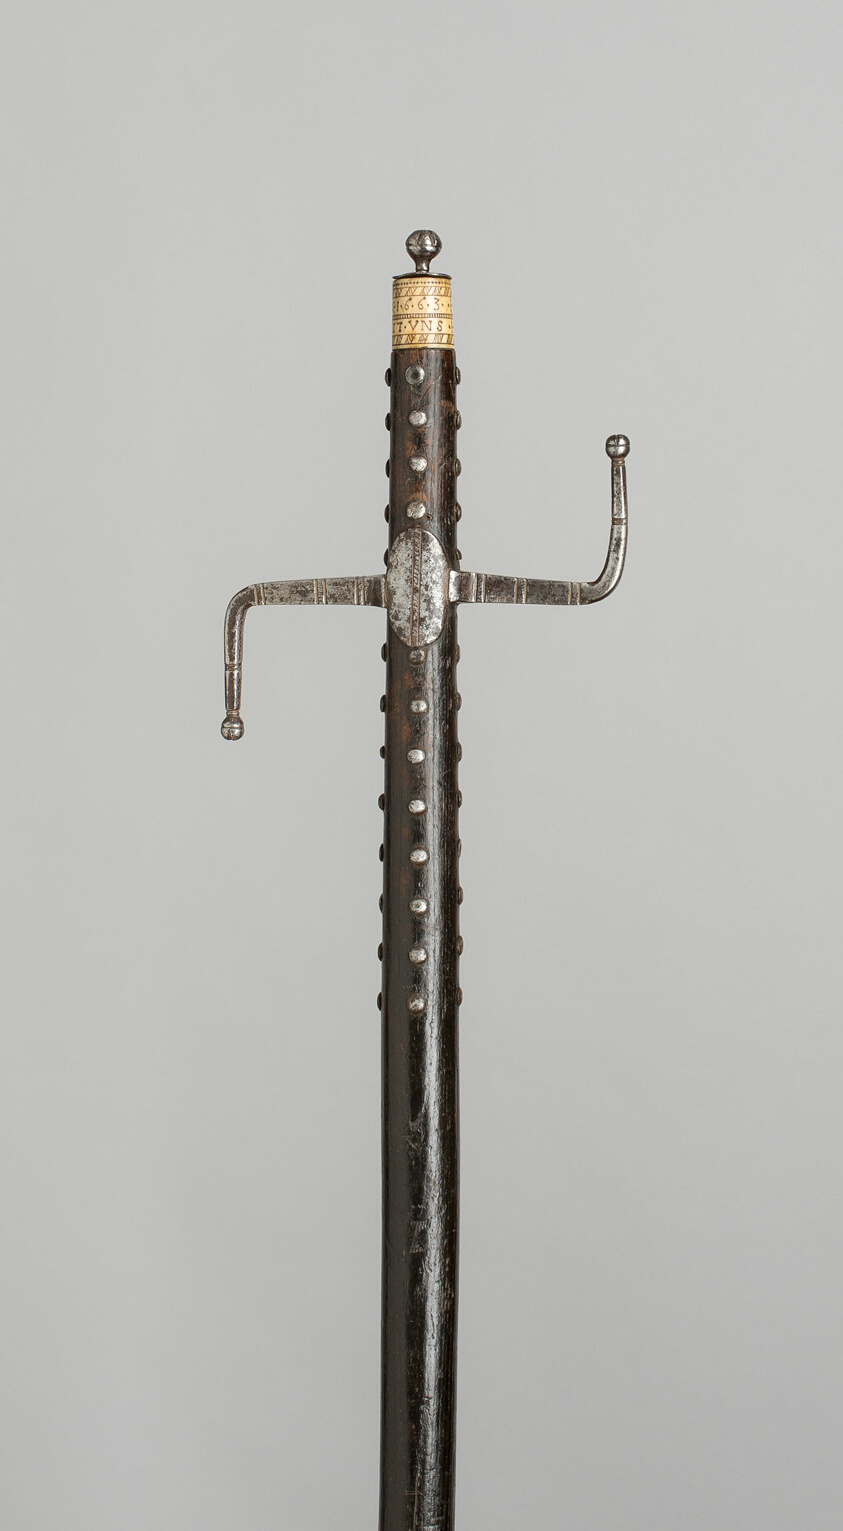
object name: Arms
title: Walking Staff with Sword Hilt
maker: German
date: 1663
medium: Wood, iron, and bone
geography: Germany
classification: arms and armor, miscellaneous; arms and armor; arms